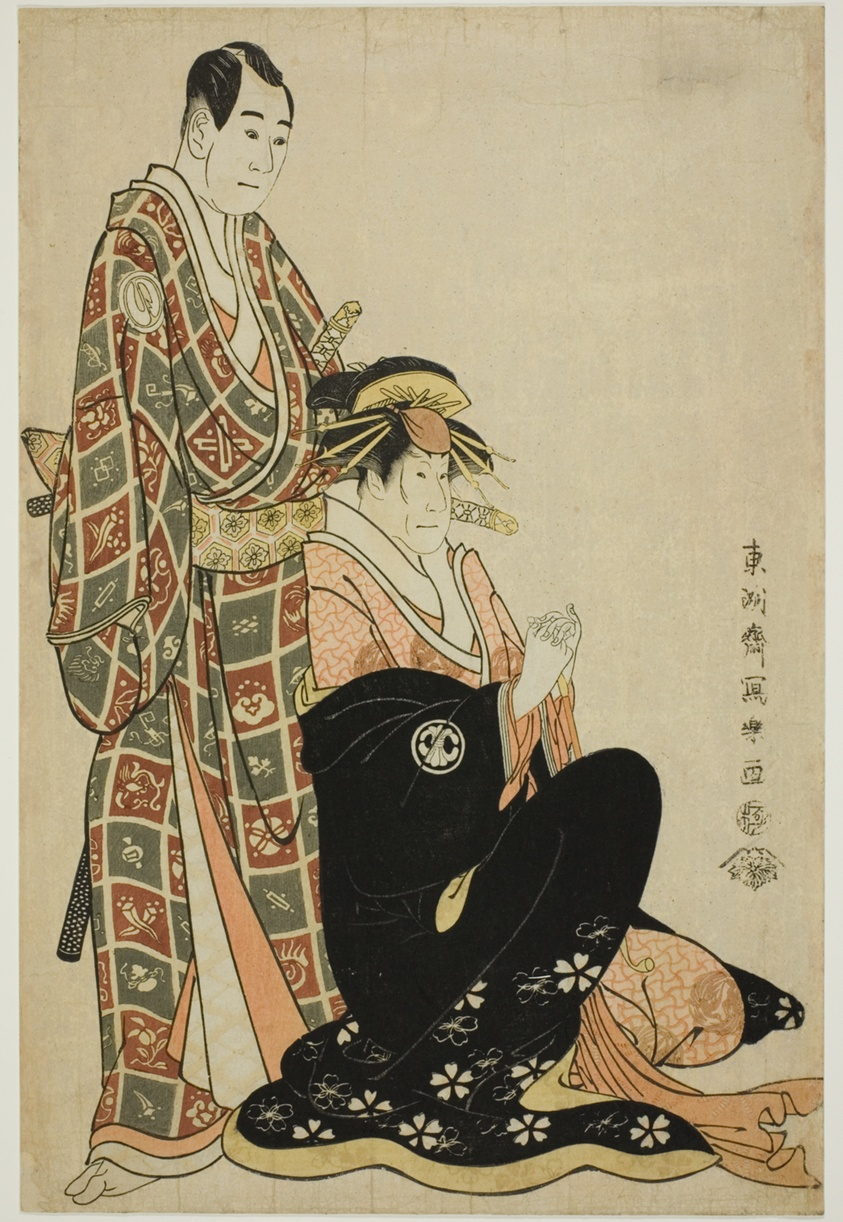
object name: Print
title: The actors Segawa Kikunojo III (R) as the courtesan Katsuragi and Sawamura Sojuro III (L) as Nagoya Sanza Motoharu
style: Japanese (culture or style)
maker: Toshusai Sharaku 東洲斎 写楽; Japanese, active 1794-95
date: 1794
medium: Color woodblock print; oban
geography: Japan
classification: woodblock print; print; asian art